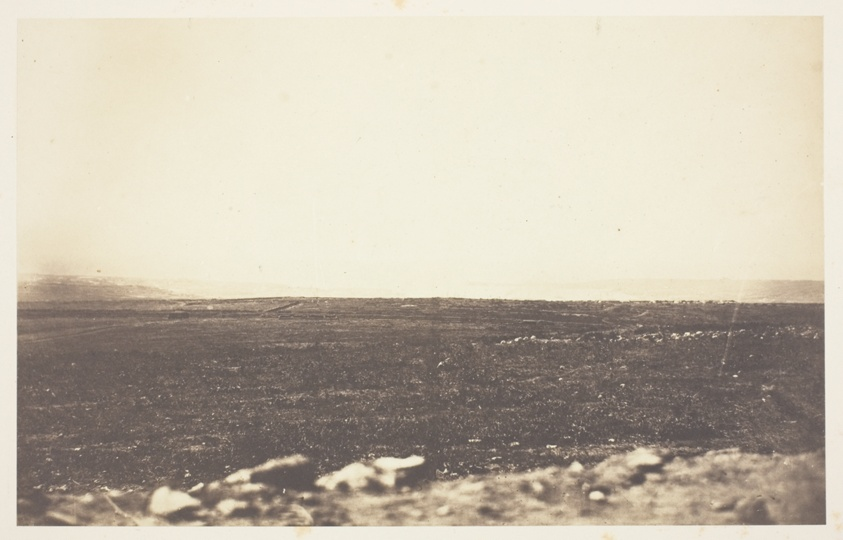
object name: Photograph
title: Sebastopol, from the Redoubt des Anglais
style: 19th century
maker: Roger Fenton (English, 1819–1869)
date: 1855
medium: Salted paper print, from the album "Photographic Pictures of the Seat of War in the Crimea" (1856)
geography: England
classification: salted paper print; photographic process; photography; photograph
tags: Collected by Hugh Edwards